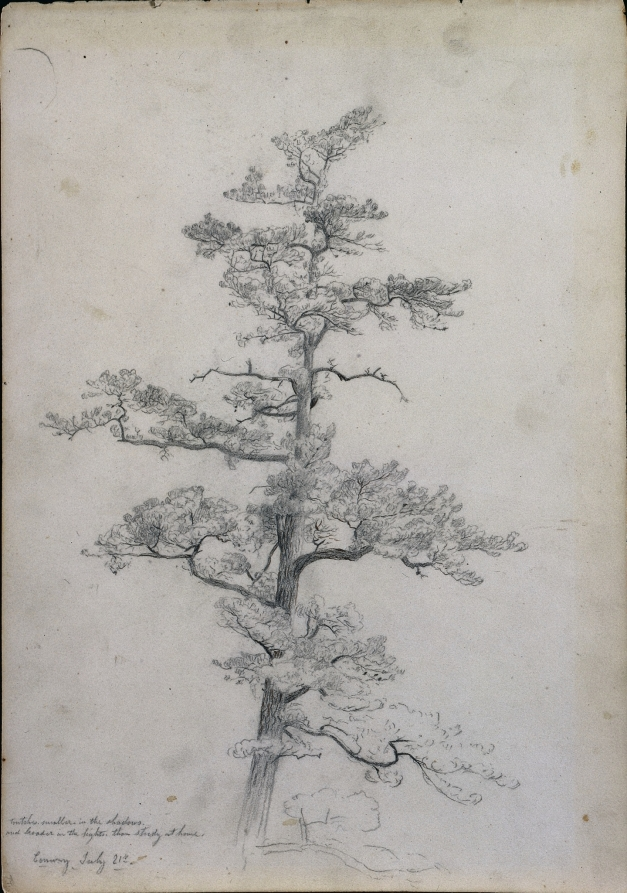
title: Pine Tree, Conway, New Hampshire (recto)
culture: America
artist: David Johnson (American, 1827–1908)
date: c. 1851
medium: graphite with pen and brown ink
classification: Drawing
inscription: by artist, in graphite, ll: toutches. [sic] smaller in the shadows. / and broader in the lights. than study at home. / Conway July 21s [fragmentally underlined]